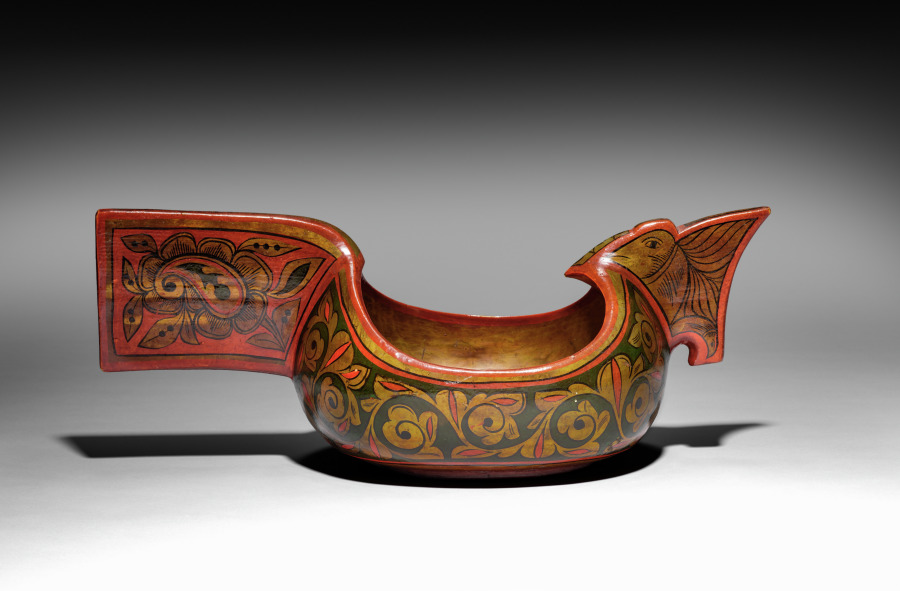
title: Wedding Cup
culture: Russia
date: before 1949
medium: lacquer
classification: Lacquer